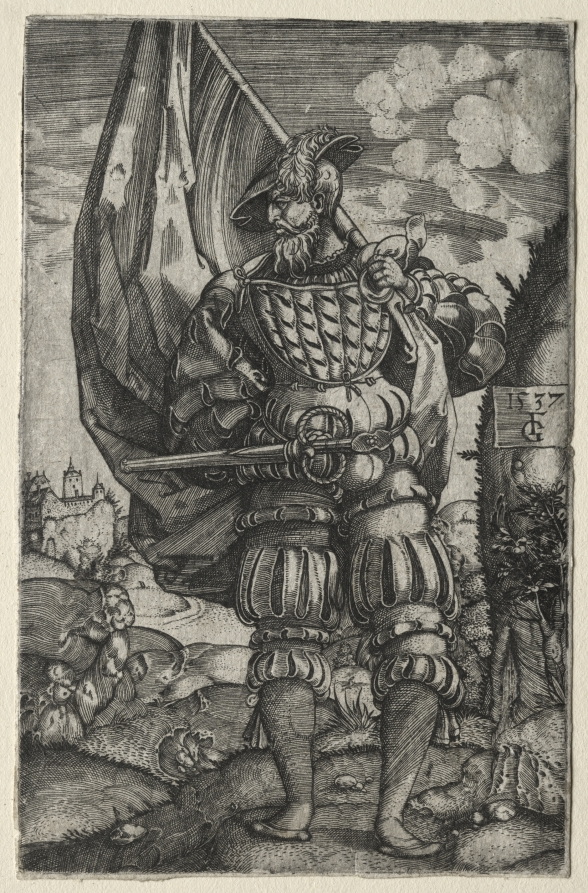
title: The Standard-Bearer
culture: Germany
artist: Master F. G. (German)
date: 1537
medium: engraving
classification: Print